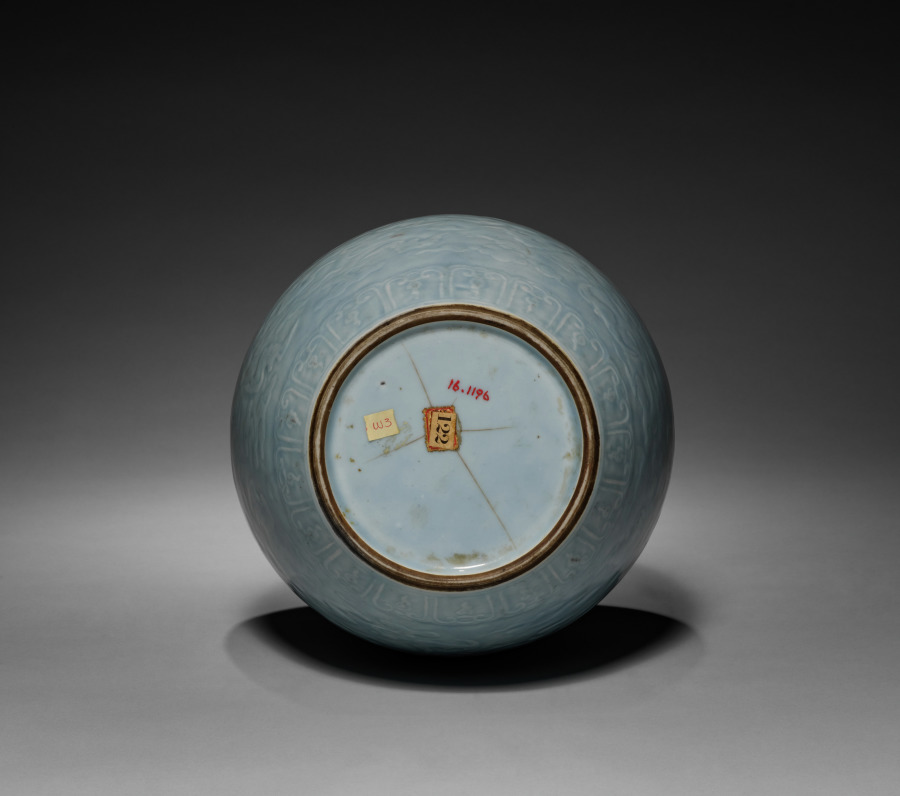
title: Jar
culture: China, Qing dynasty (1644–1911), Qianlong reign (1736–95)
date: 1736–95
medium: porcelain with molded decoration and blue glaze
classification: Ceramic